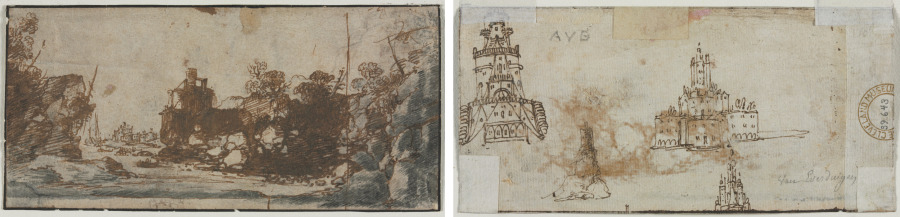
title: Rocky Inlet with Boats and Buildings (recto); Sketches of Castles (verso)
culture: Netherlands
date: 1600s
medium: pen and brown ink, point of brush and black and gray wash, and brush and gray wash over traces of graphite; framing lines in brown ink (iron gall)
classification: Drawing